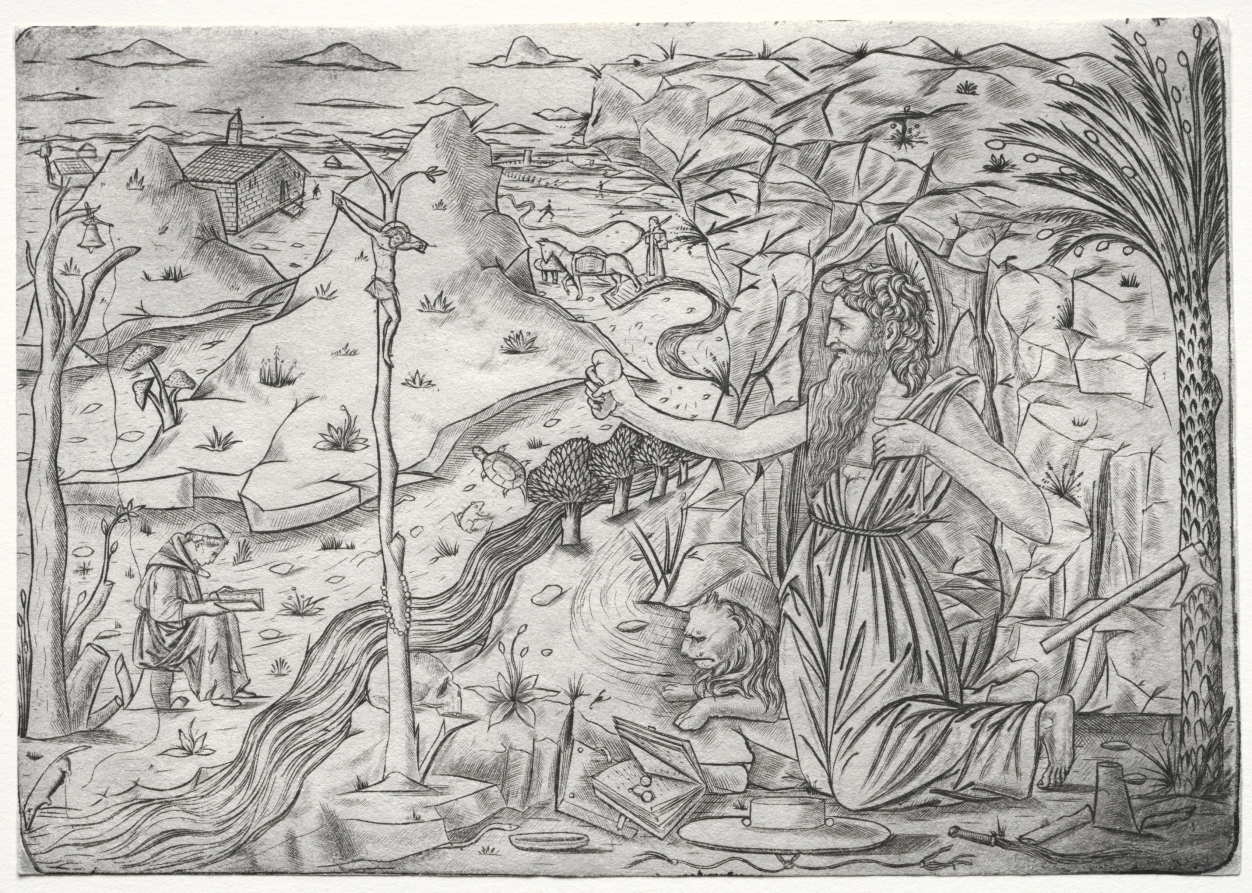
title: Saint Jerome in Penitence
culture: Italy, Florence or Northern Italy, 15th century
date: c. 1480–1500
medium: engraving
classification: Print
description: In this inhospitable landscape, Saint Jerome appears strong and sure, praying toward a crucifix and holding a rock to beat his chest. Jerome retreated to the desert near Antioch (present-day Turkey) for four years to purify his soul through physical suffering. The cardinal’s hat and book refer to his later work translating the Bible into Latin, and the lion was his companion after he pulled a thorn from its paw. A tree holding a crucifix with a skull at its base refers to Christ’s cross and to Eden. The man at left may be a traveling friar begging for sustenance.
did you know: The rock in Saint Jerome's hand was used by the saint to beat his chest when he experienced hallucinations brought on by his isolation in the desert.